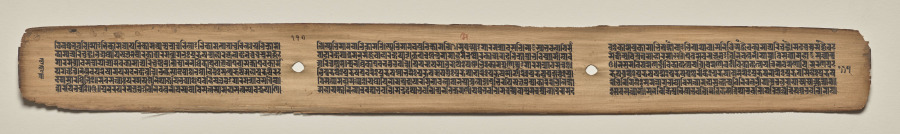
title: Text, Folio 117 (verso), from a Manuscript of the Perfection of Wisdom in Eight Thousand Lines (Ashtasahasrika Prajnaparamita-sutra)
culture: Eastern India, Bihar, Vikramashila Monastery. Painting: Nepal, Kathmandu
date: Sunday, September 14, 1119 (year 239 of the Newar Samvat in the month of Ashvina)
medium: gum tempera and ink on palm leaves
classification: Painting